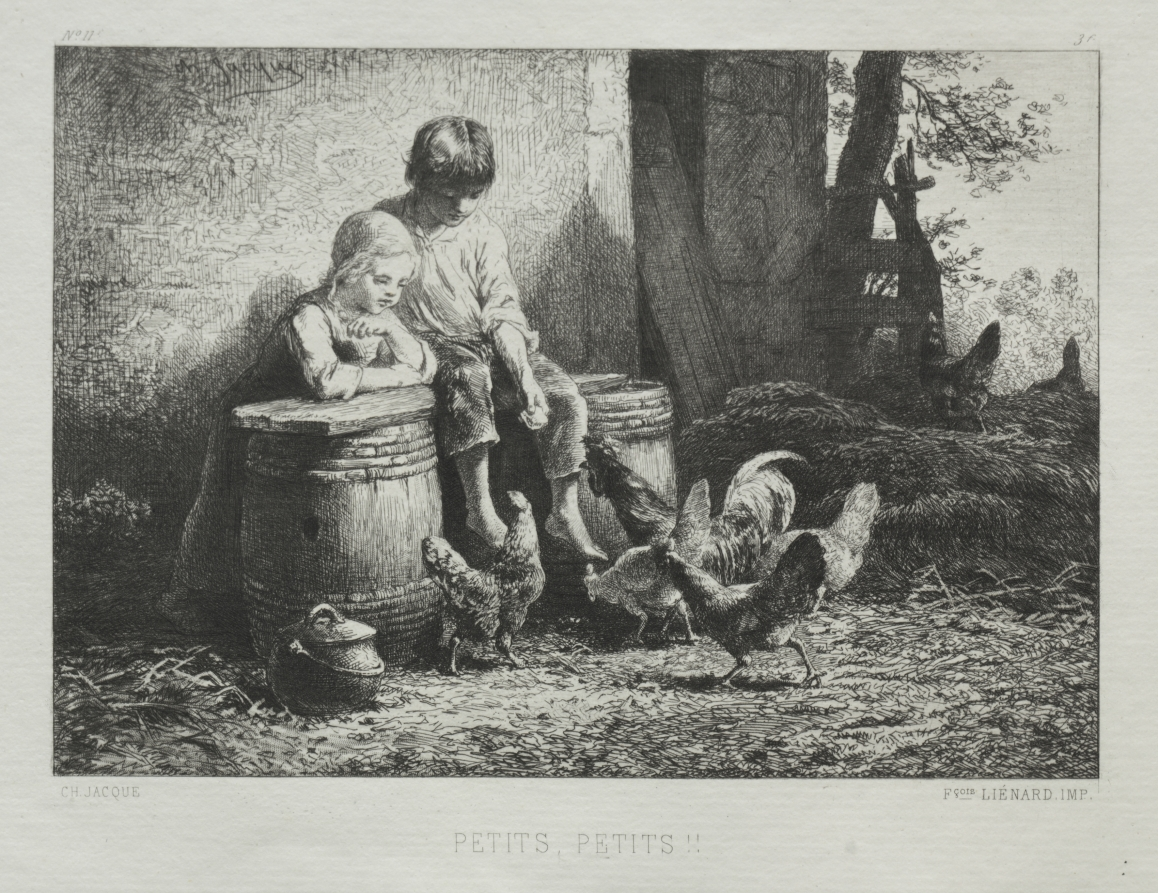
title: Petite, Petite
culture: France, 19th century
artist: Charles-Émile Jacque (French, 1813–1894)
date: 1864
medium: etching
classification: Print